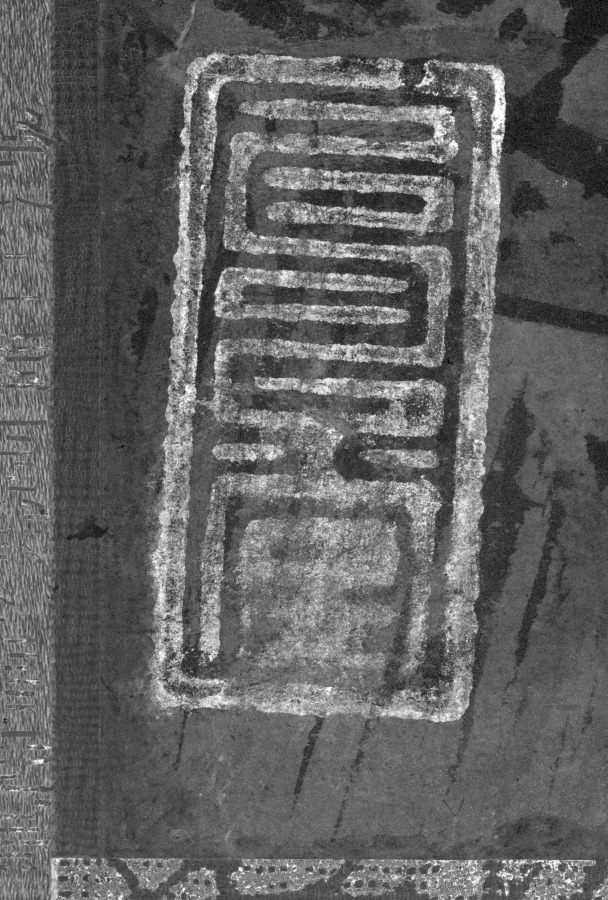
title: Landscape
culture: Japan, Muromachi period (1392–1573)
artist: Judō (Japanese, active 16th century)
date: 1500s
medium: hanging scroll, ink and light color on paper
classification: Painting